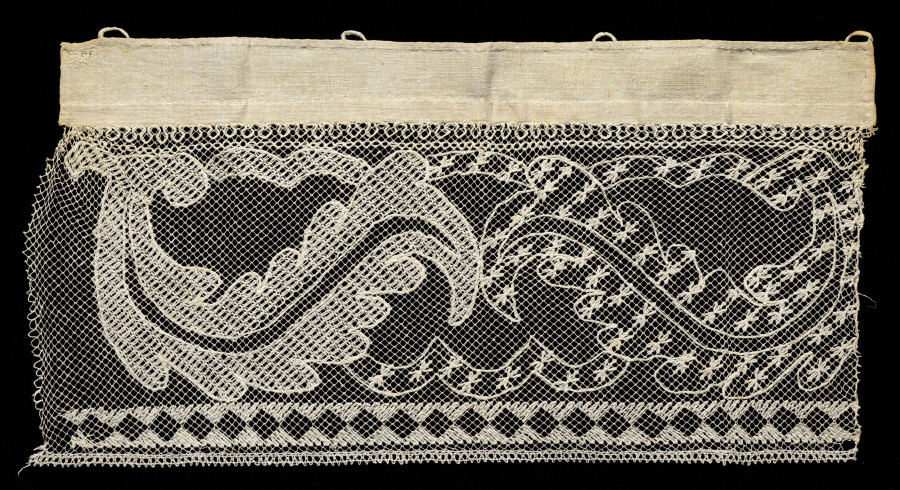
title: Lace Border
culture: Spain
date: 1700s (probably)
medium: Bobbin lace and embroidered net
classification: Lace